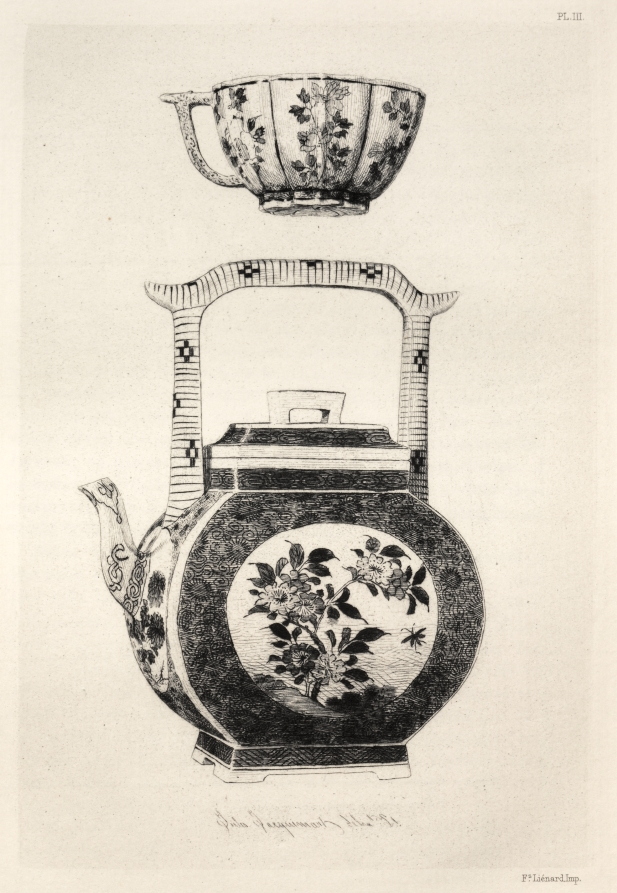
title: History of the Ceramic Art: A Descriptive and Philosophical Study of the Pottery of All Ages and All Nations: Japan: Artistic Decoration- Saucer with Rich Enamelled Ground, and Medallion Representing the Goddess Kouanin (Plate IV)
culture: France, 19th century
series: Book by Albert Jacquemart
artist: Jules Jacquemart (French, 1837–1880)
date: 1877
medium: etching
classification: Bound Volume